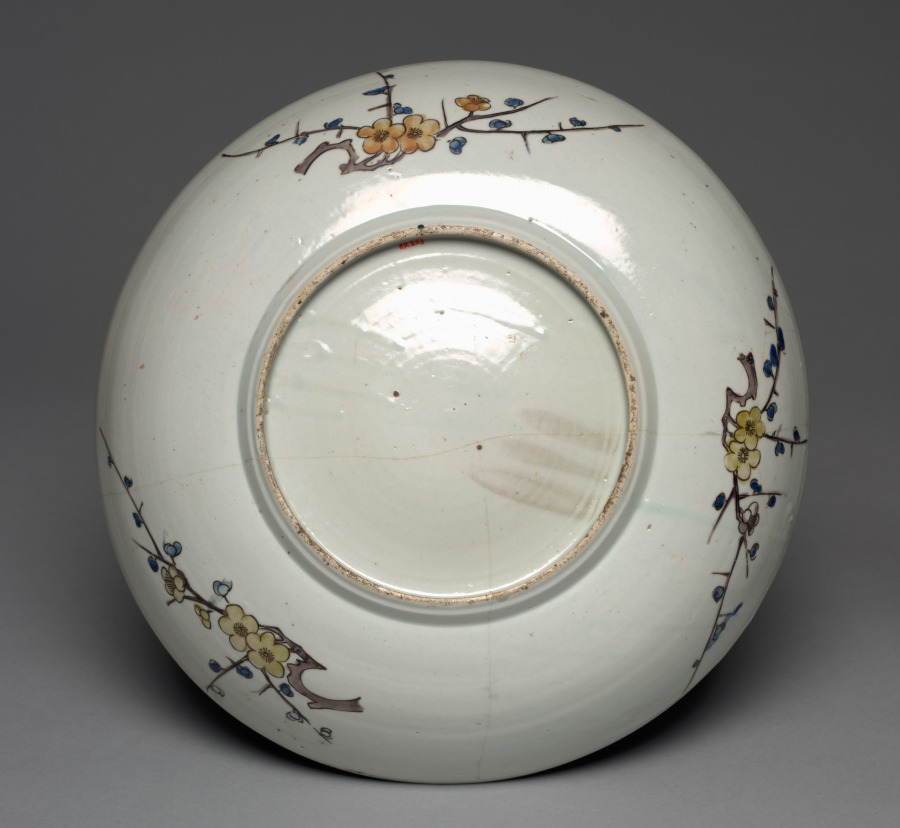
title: Plate with Bird and Flower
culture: Japan, Meiji period (1868–1912) or Taishō period (1912–26)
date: early 1900s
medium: Porcelain with overglaze enamel (Ko-Kutani revival style)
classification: Ceramic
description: This dish is a sophisticated example of later ceramists reinterpreting earlier styles of Japanese porcelain. The colors and patterns used look similar to some works produced on the island of Kyushu in the1600s and 1700s. However, the idea to combine alternating blocks of yellow, green, purple, and blue with a "Chinese grasses" (karakusa) pattern around the rim of the dish is one hit upon in the early 1900s by an artist familiar with the colors and patterns of earlier works.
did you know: Porcelain must be fired at a high temperature to achieve its strength and semitranslucent surface.